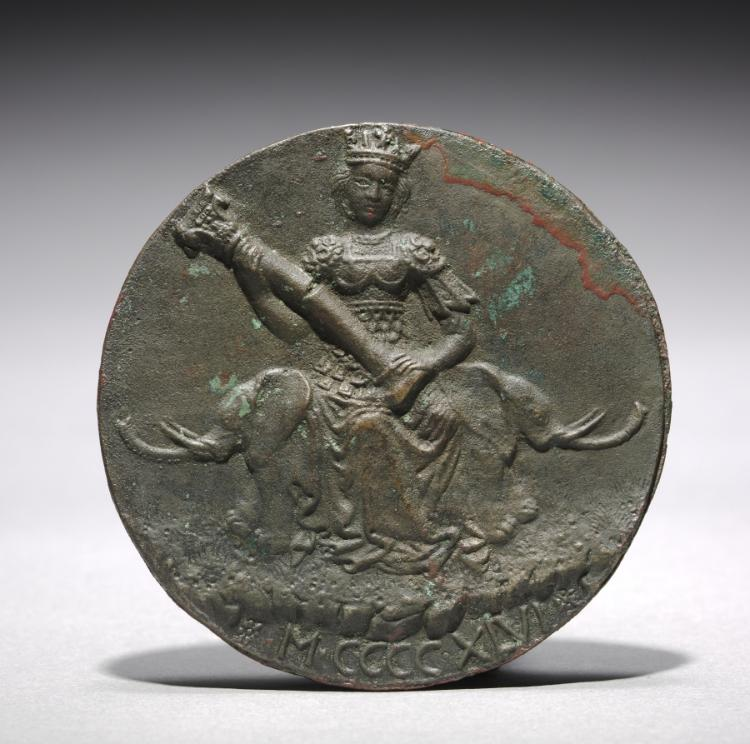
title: Portrait of Sigismondo Pandolfo Malatesta, Lord of Rimini and Fano (reverse)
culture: Italy, 15th century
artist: Matteo de' Pasti (Italian, 1420–1467/68)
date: 15th century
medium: bronze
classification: Sculpture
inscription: located below the seated figure of Fortitude: MCCCCXLVI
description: Malatesta was both a ruthless military leader and a man of considerable learning and culture. His medals, largely used for propoganda purposes, are among the earliest examples of the medium and speak to the innovations in the classical tradition that he fostered in Rimini. The original model dates to 1446, but this cast probably dates to the late 19th or early 20th century.